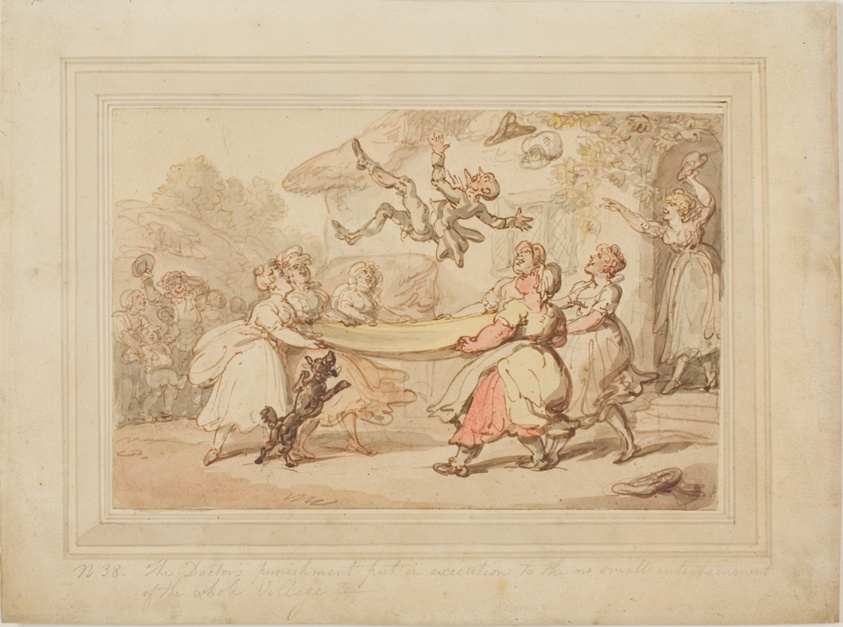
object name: Drawing and Watercolor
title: The Doctor's Punishment Put in Execution to the Small Entertainment of the Whole Village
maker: Thomas Rowlandson (English, 1756-1827)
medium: Pen and brown and gray ink with brush, and watercolor with graphite, on tan wove paper, laid down on card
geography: England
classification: watercolor; drawings (visual works); prints and drawing